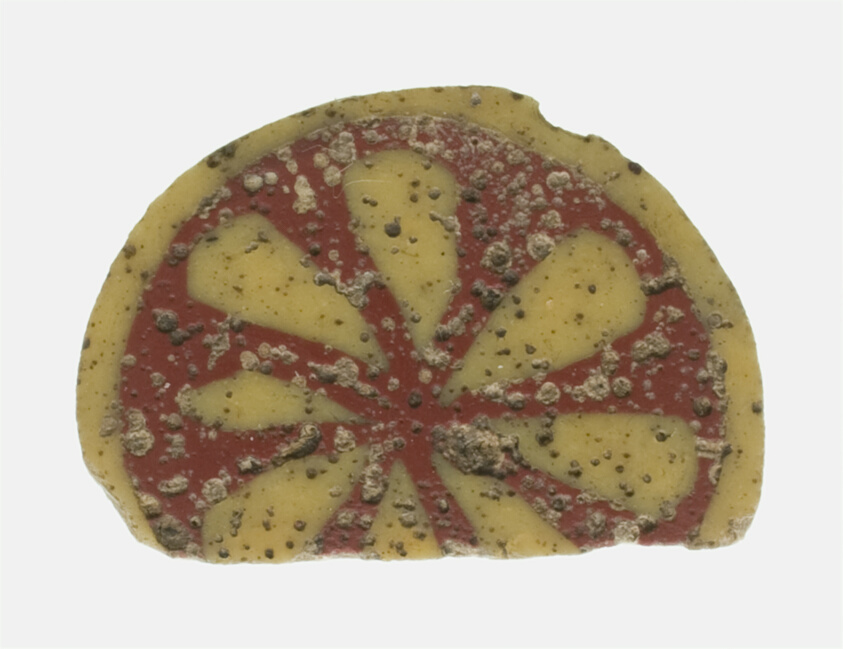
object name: Decorative Arts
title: Fragment of an Inlay Depicting a Rosette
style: roman (ancient, style or period), ancient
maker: Roman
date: 1st century BCE–1st century CE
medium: Glass, mosaic glass technique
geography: Italy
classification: glass; inlay; ancient art; decorative arts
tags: decoration